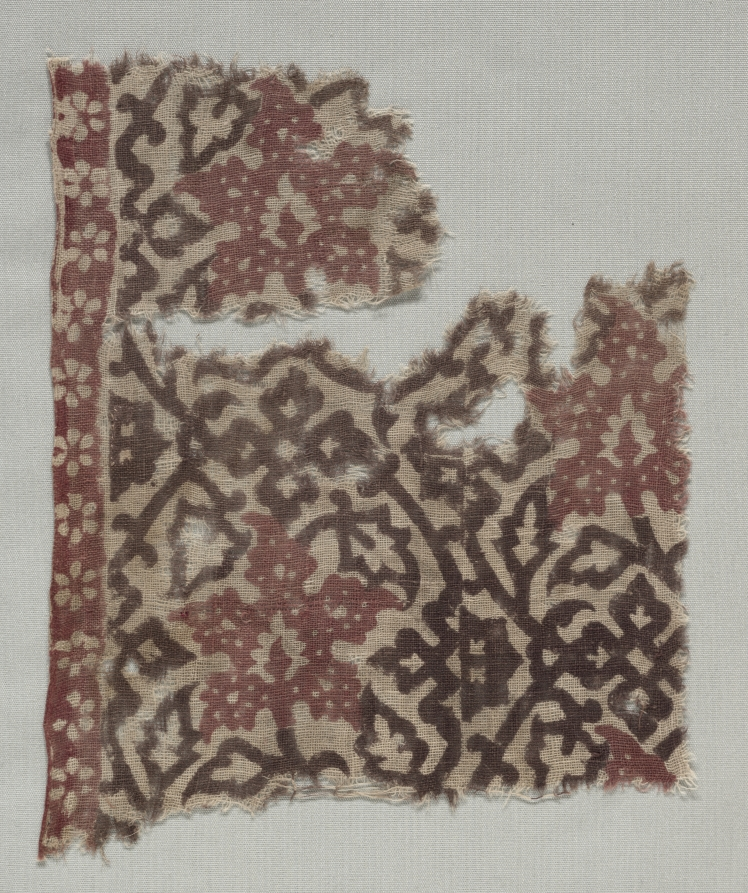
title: Fragment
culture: India, 12th-14th century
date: 1100s - 1300s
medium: woodblock print on cotton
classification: Textile